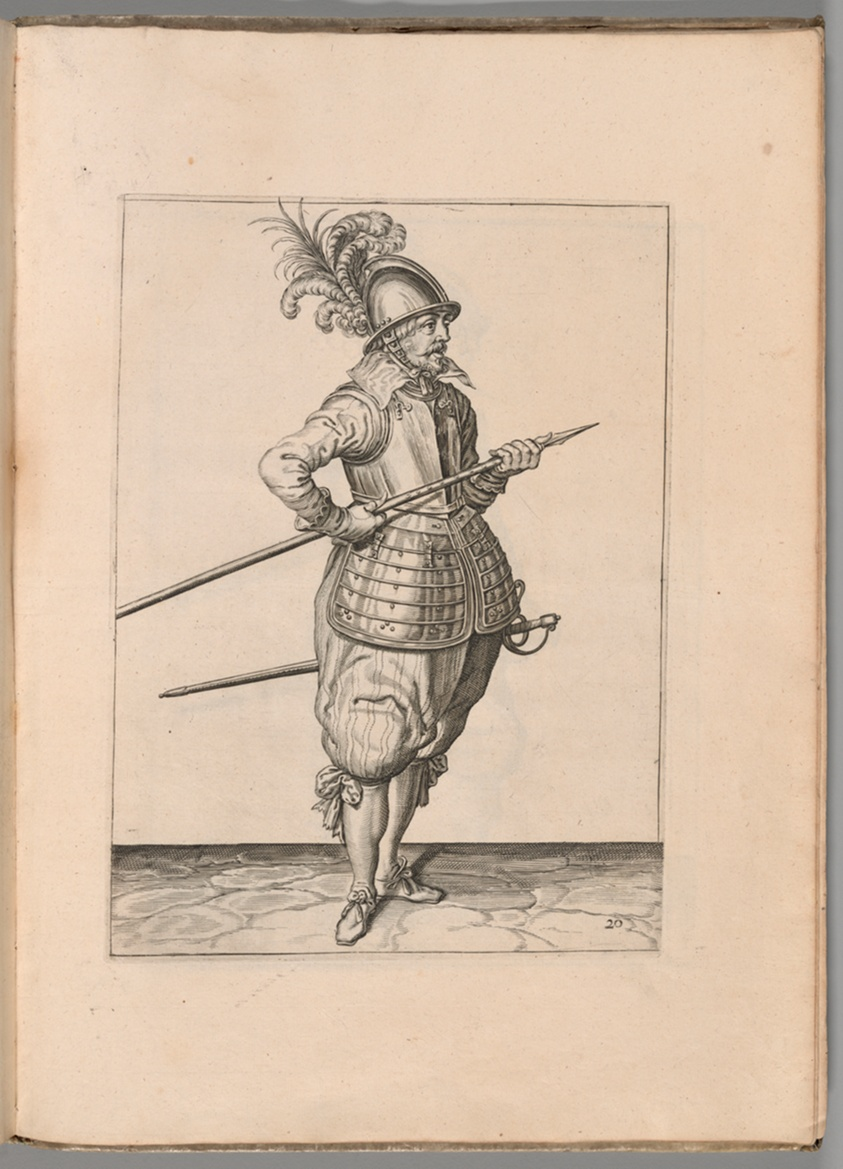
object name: Book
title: Exercise of Arms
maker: Jacob de Gheyn, II (Dutch, 1565-1629)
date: 1608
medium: Illustrated book featuring 117 copper plate engravings on ivory laid paper; full vellum binding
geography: Netherlands